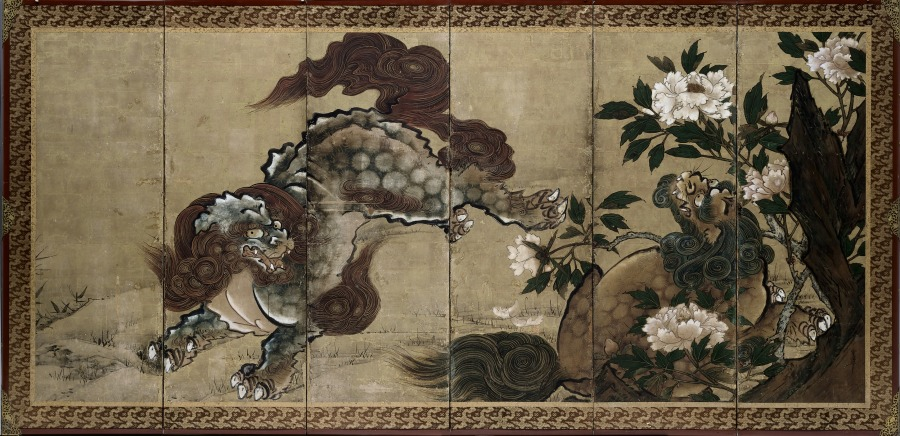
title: Lions and Tigers in Peony and Bamboo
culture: Japan, Edo period (1615–1868)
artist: Yamaguchi Sekkei (Japanese, 1644–1732)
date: 1668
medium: One of a pair of six-panel folding screens; ink and color on gilded paper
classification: Painting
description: Sekkei lived and studied painting in Kyoto at the Kano school studio, the center of traditional painting activity in Japan since 1500. The use of gold foil as a backdrop for the frolicking animals served a practical as well as a decorative function. Because traditional Japanese rooms had no windows, interior lighting came from portable oil lamps and wax candles, whose effects were magnified by reflective surfaces.